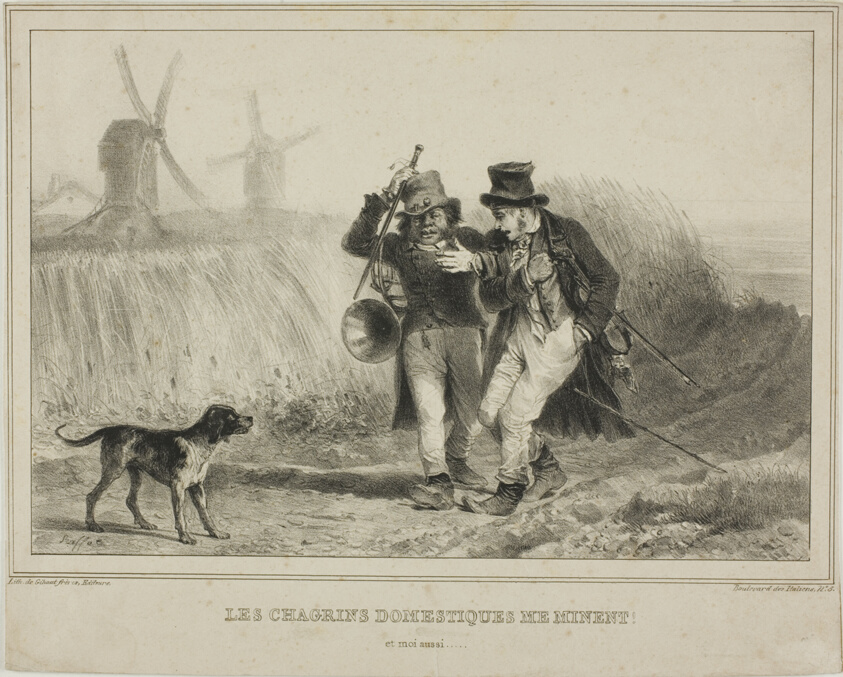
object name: Print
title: The Domestic Sorrows are my Torment!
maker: Denis Auguste Marie Raffet (French, 1804-1860); printed by Chez Gihaut Frères (French, 19th century)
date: 1836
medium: Lithograph in black on buff wove paper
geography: France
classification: lithograph; print; prints and drawing